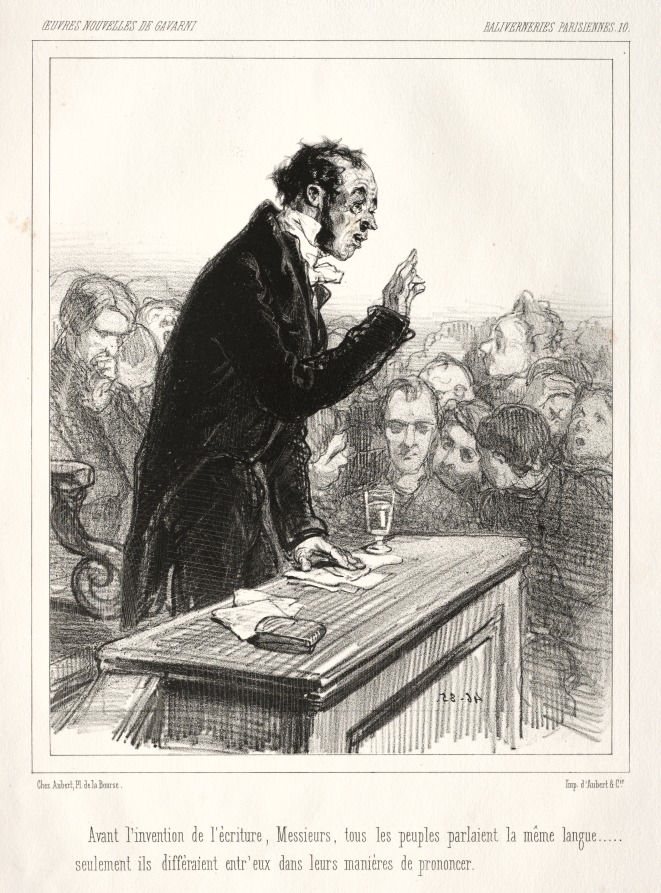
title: Baliverneries Parisiennes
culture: France, 19th century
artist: Paul Gavarni (French, 1804–1866)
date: c. 1847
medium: lithograph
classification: Print